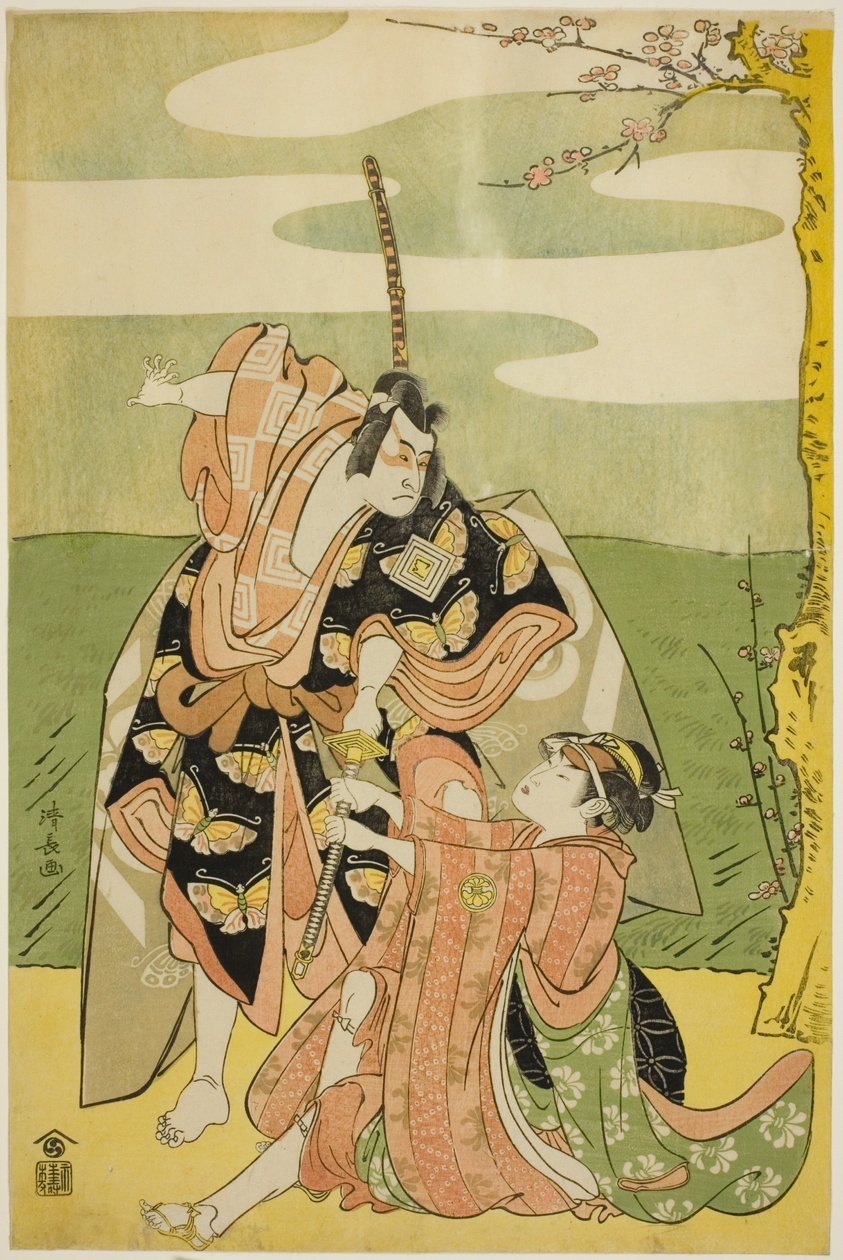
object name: Print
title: The Actor Ichikawa Monnosuke II as Soga no Goro and Segawa Kikunojo III as Tsukisayo, in the play "Nanakusa Yosooi Soga," performed at the Nakamura Theater in the first month, 1782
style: Japanese (culture or style)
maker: Torii Kiyonaga (Japanese, 1752-1815)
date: c. 1782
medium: Color woodblock print; oban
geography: Japan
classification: woodblock print; print; asian art